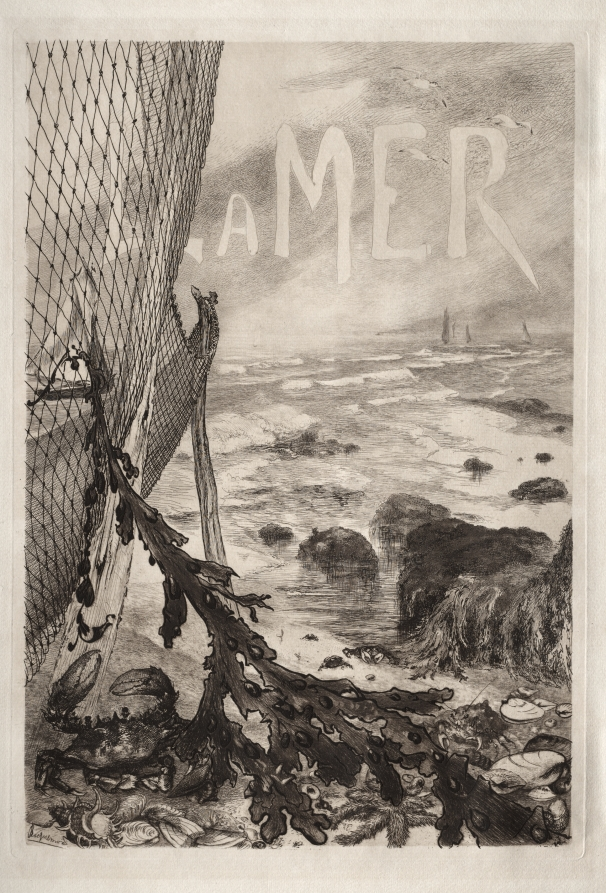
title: The Sea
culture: France, early 20th century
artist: Félix Bracquemond (French, 1833–1914)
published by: Art et Décoration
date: 1905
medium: etching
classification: Print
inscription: signed in plate, lower left: Bracquemond